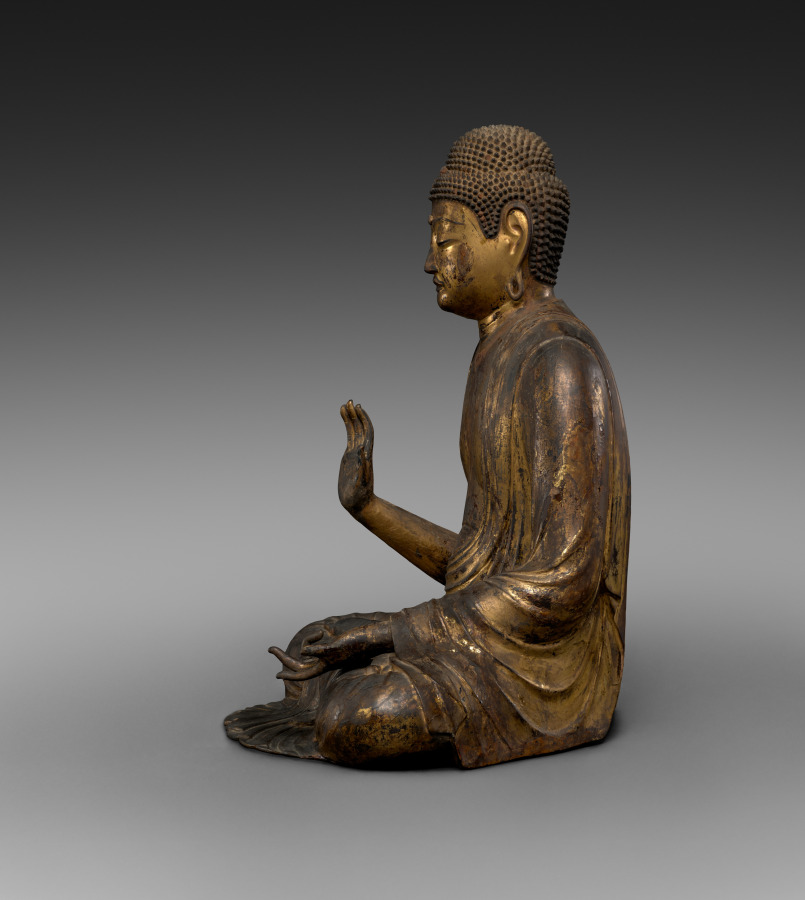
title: Seated Buddha (sculpture)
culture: Japan, Heian period (794–1185)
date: 1100s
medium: gilded wood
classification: Sculpture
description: Composed of a number of hollowed-out pieces of wood that were then covered with lacquer and gilding, this sculpture served as an image of worship in one of the small temples surrounding Kōfukuji, a major Buddhist temple in Nara, Japan. Like many Buddhas, this figure has its right hand positioned in a gesture meaning "fear not." The left hand is a replacement, so its original gesture, a clue to this Buddha's identity, is unknown. However, as the left foot is exposed over the garment, in lotus position, it may have been created as a Medicine Master Buddha, Yakushi Nyorai in Japanese, or the Buddha of our era, Shakyamuni.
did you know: This Buddha is sculpted in the Jōchō style, associated with the sculptor of the Amida at Byōdō'in in Uji.